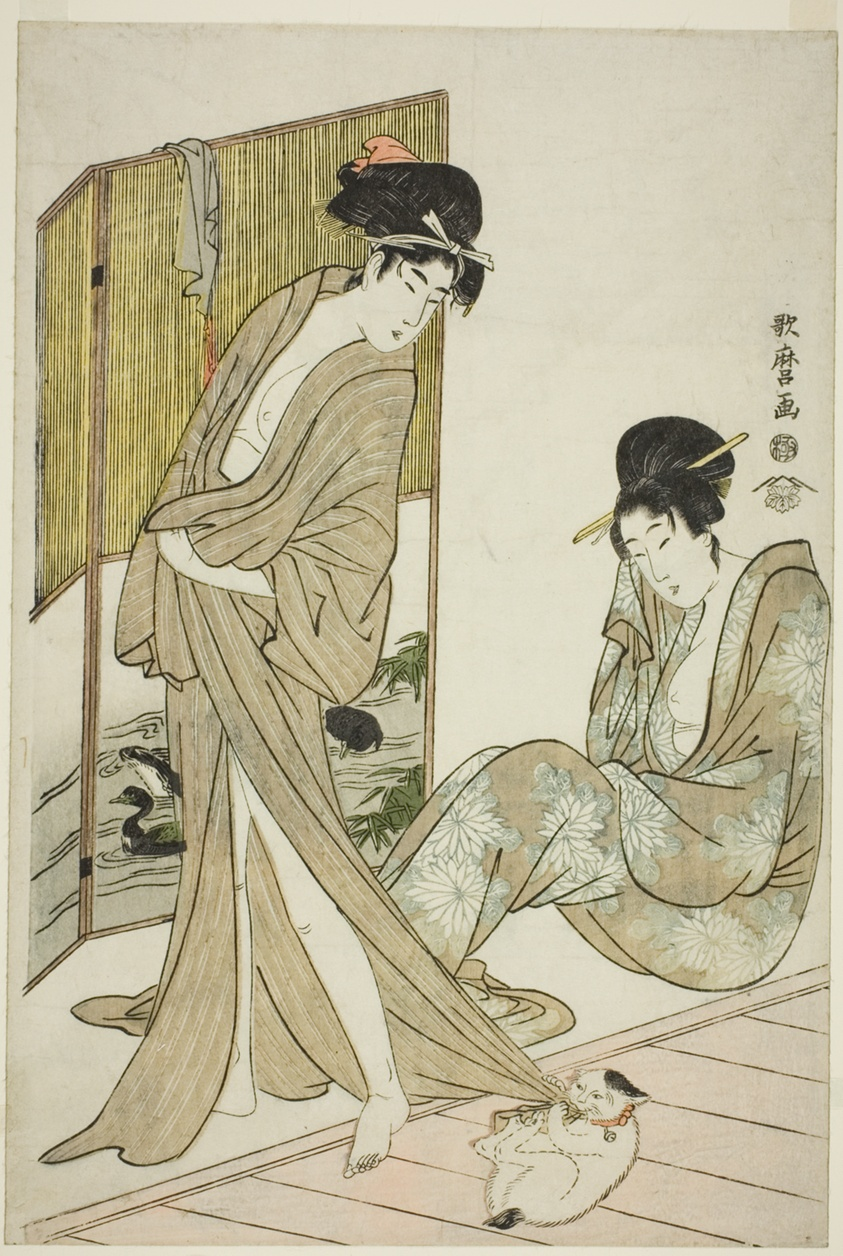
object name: Print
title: Two Young Women after a Bath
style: Japanese (culture or style)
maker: Kitagawa Utamaro 喜多川 歌麿; Japanese, 1753 (?)-1806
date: c. 1803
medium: Color woodblock print; oban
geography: Japan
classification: woodblock print; print; asian art